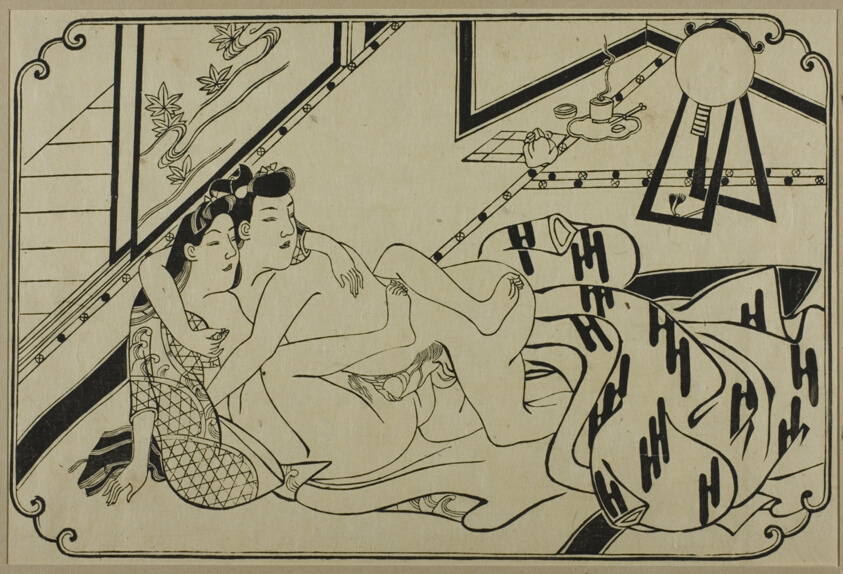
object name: Print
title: A sheet from a shunga album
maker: Hishikawa Moronobu (Japanese, d.1694)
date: 1680s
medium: Woodblock print; sumizuri-e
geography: Japan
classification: woodblock print; print; asian art